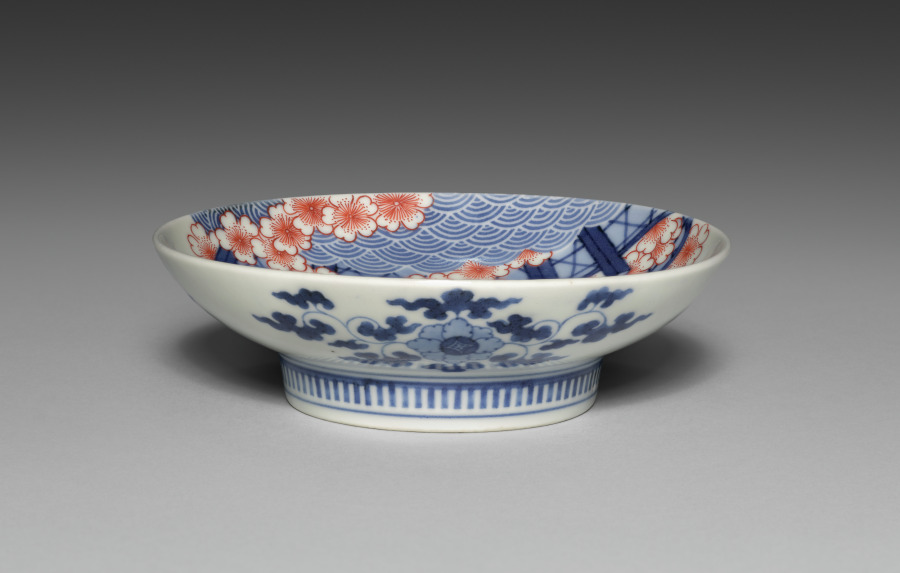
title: Small Dish (Kozara) with Cherry Blossoms in Baskets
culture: Japan, Edo period (1615–1868)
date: c. 1670‒1710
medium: Porcelain with underglaze blue and overglaze color enamel (Hizen ware, Nabeshima type)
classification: Ceramic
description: The cherry blossoms and stylized wave pattern that appear on this dish remain popular today.